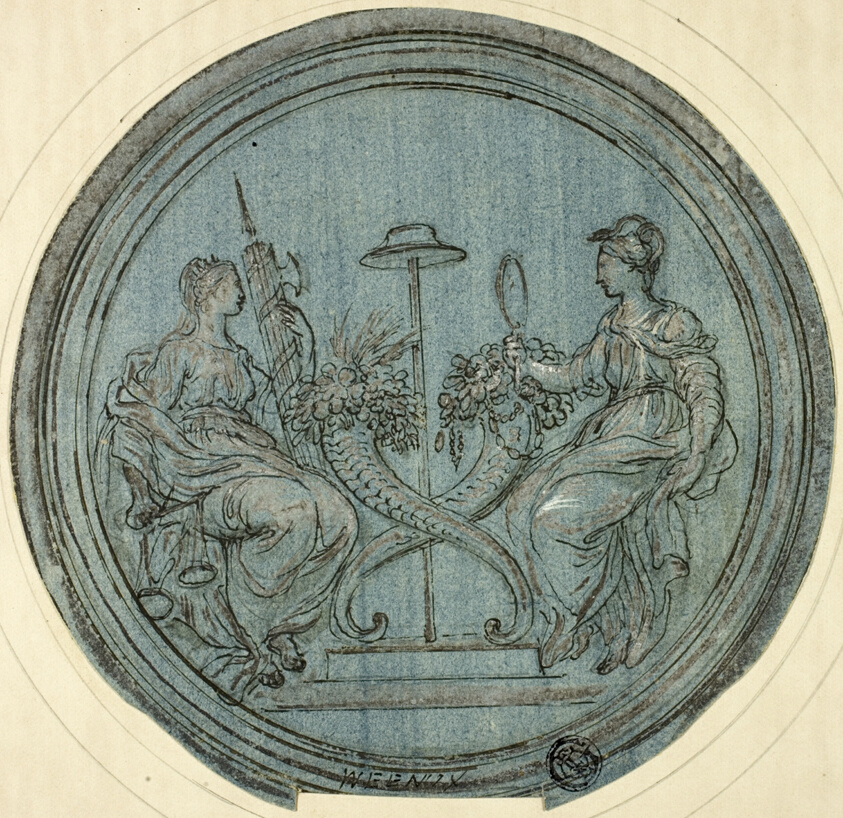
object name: Drawing and Watercolor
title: Roundel with Justice and Prudence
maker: Jan Baptist Weenix (Dutch, 1621-1660); or Willem van de Velde, II (Dutch, 1633-1707)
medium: Pen and brown ink, with brush and lead white, on blue tinted wove paper, laid down on card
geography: Holland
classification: pen and ink drawings; drawings (visual works); prints and drawing